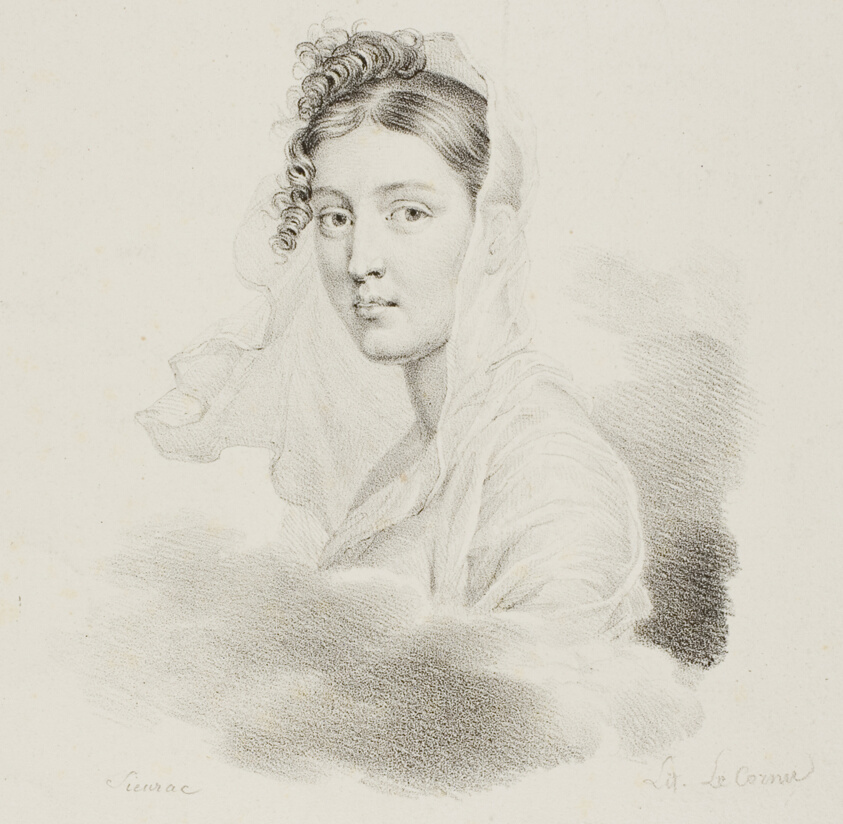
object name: Print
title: Portrait of a Woman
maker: Francois-Joseph-Juste Sieurac (French, 1781-1832); probably printed by Lecornu (French, 18th-19th century)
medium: Lithograph in black on ivory wove paper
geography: France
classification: lithograph; print; prints and drawing